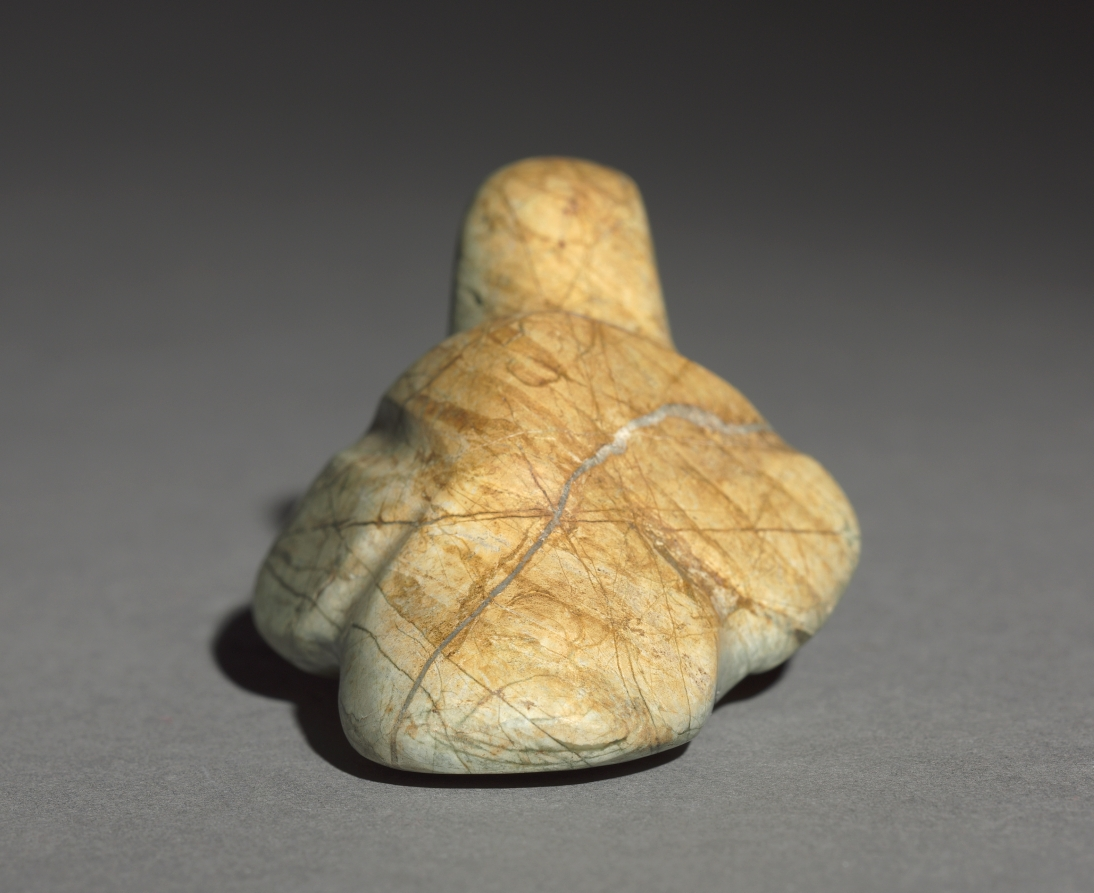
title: Bird Pendant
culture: Mesoamerica, Mexico, Guerrero, Mezcala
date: 100 BCE–300 CE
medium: polished gray-brown stone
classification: Sculpture